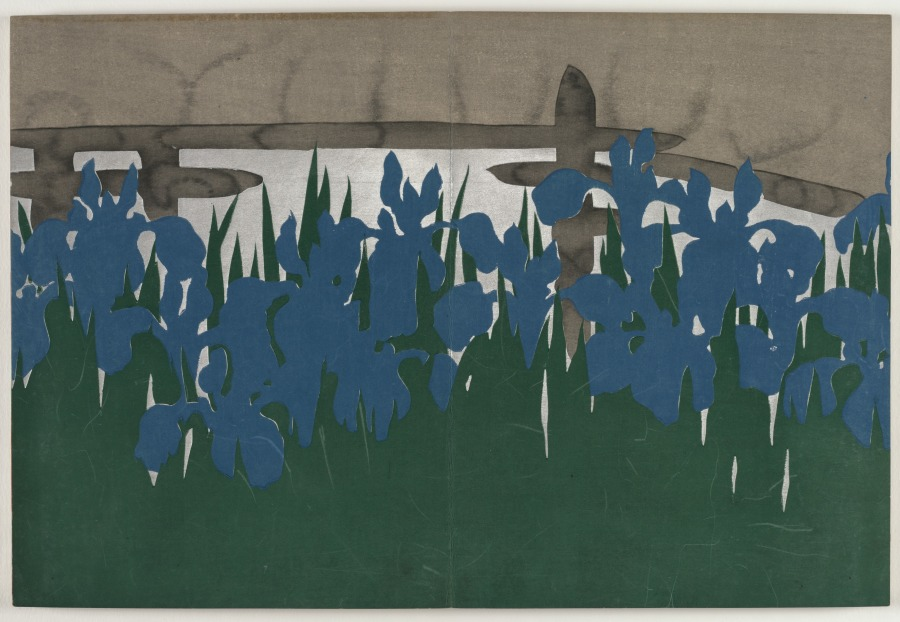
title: Flowers of a Hundred Worlds (Momoyogusa): Eight Bridges (Yatsuhashi)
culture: Japan, Meiji period (1868–1912)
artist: Kamisaka Sekka (Japanese, 1866–1942)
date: 1909–10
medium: color woodcuts with gold and silver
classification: Bound Volume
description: This print from a set of three woodblock printed albums displays the graphic design prowess of Kamisaka Sekka. The images were first distributed one by one to subscribers to the series but later were reissued in bound form, like this book, for mass consumers. Each print features a vignette taken from nature or Japanese literature. Many of the scenes have a long history in Japan, originating in the 900s or 1000s and having been interpreted by all manner of artists since that time. Sekka’s selections hew closely to precedents from the Rinpa style originated by painter Tawaraya Sōtatsu (c. 1570–c. 1640) and calligrapher Hon’ami Kōetsu (1558–1637).